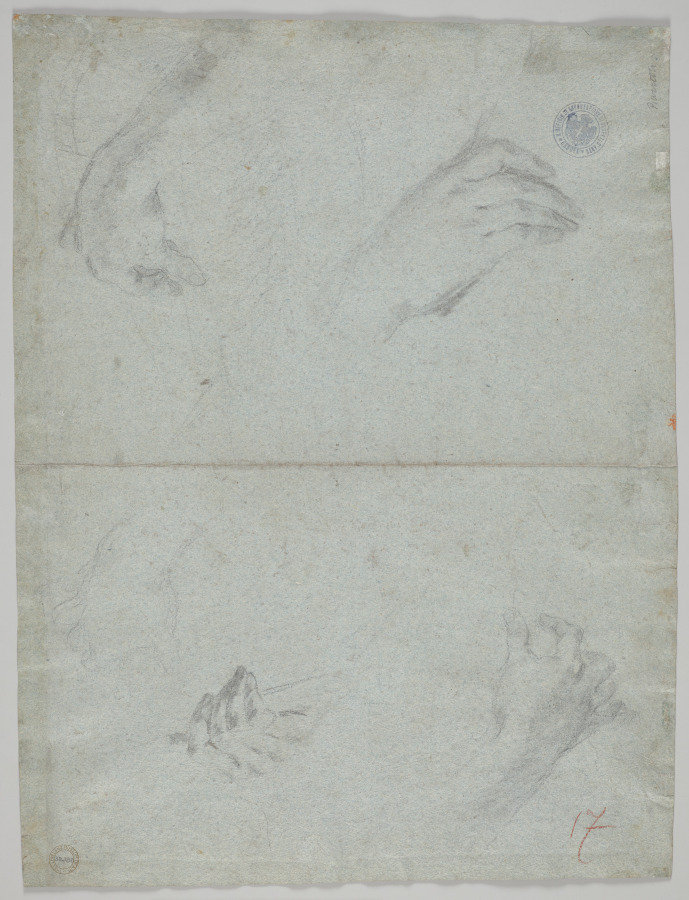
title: Studies of Hands Playing Instruments (verso)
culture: Italy, Venice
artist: Giovanni Battista Piazzetta (Italian, 1682–1754)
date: 1723–27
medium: black chalk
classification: Drawing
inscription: lower left, in red chalk: 17 [sideways] ; lower right, in graphite: Piazzetta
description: This drawing was completed in preparation for the most prestigious religious commission of Giovanni Battista Piazzetta’s career, the ceiling painting of the Glory of St. Dominic for the church of SS. Giovanni e Paolo in Venice. Both the finished painting, which depicts St. Dominic’s arrival in heaven amid a thundery vortex, and Piazzetta’s study for the angel, who carries St. Dominic on a cloud, depart from Venetian tradition. To execute this airborne subject, he likely drew from wax or clay models suspended in midair in order to study the illusionistic di sotto in su (from below to above) perspective and the play of light found on the angel’s shadowed form. He worked out the angel’s twisting pose, imbuing it with a lively sense of movement, and accentuated the drapery’s folds with heavy lines as though considering their visibility from afar. There are only slight changes in the angel’s pose between this drawing and the completed painting. As few of Piazzetta’s preparatory studies for paintings exist, Cleveland’s sheet offers rare insight to the artist’s working methods.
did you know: The Venetian blue paper (carta azzurra) of this sheet was the preferred medium for preparatory drawings among artists in Venice at the time this drawing was made.